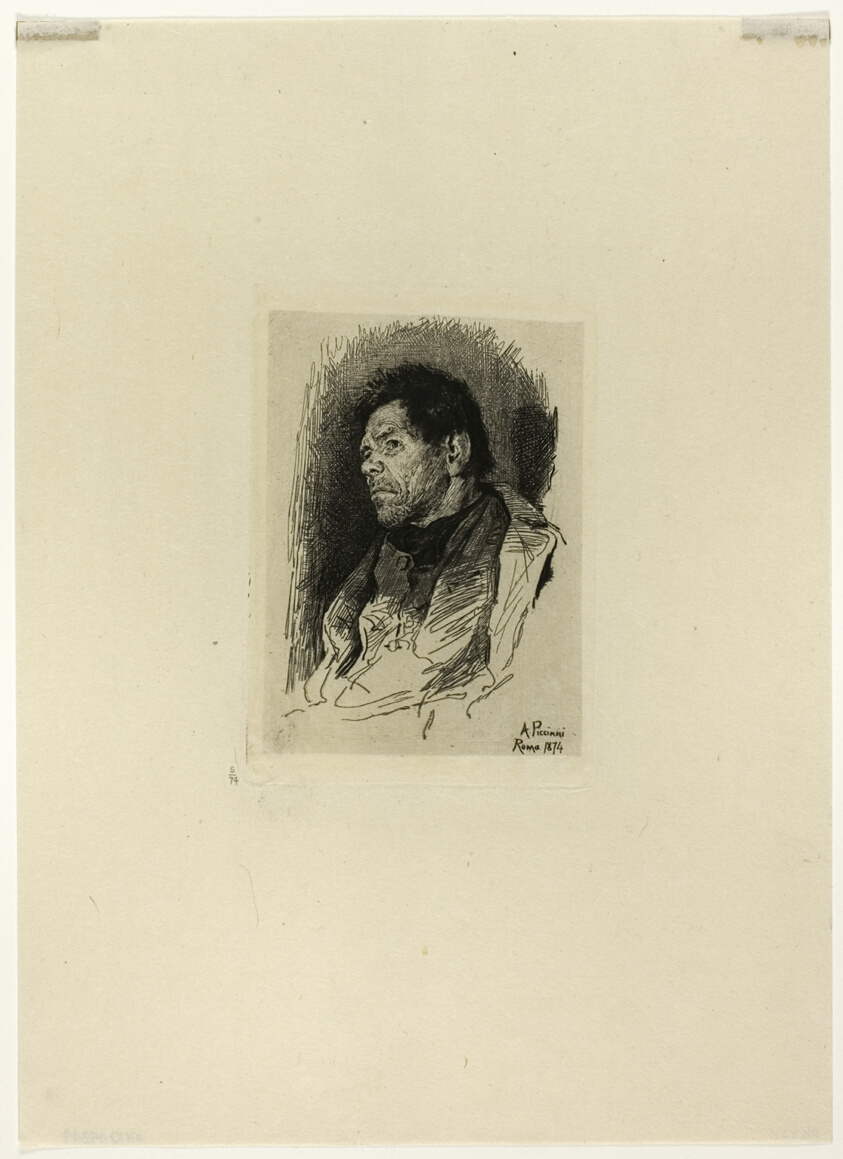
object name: Print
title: Seated Man Facing Left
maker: Antonio Piccinni (Italian, 1846-1920)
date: 1874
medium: Etching in black on paper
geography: Italy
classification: etching; print; prints and drawing